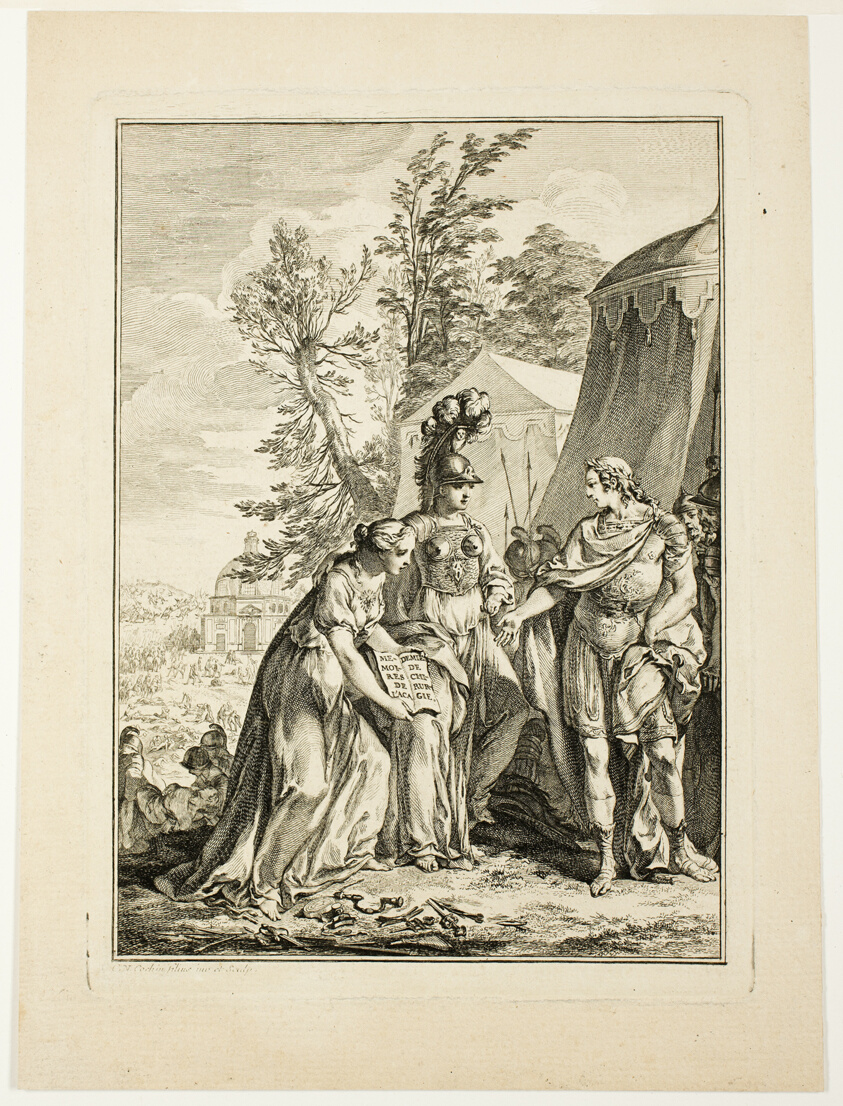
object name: Print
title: Allegory of Surgery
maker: Charles-Nicholas Cochin, the younger (French, 1715-1790)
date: 1741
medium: Etching on buff laid paper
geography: France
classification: engraving; print; prints and drawing